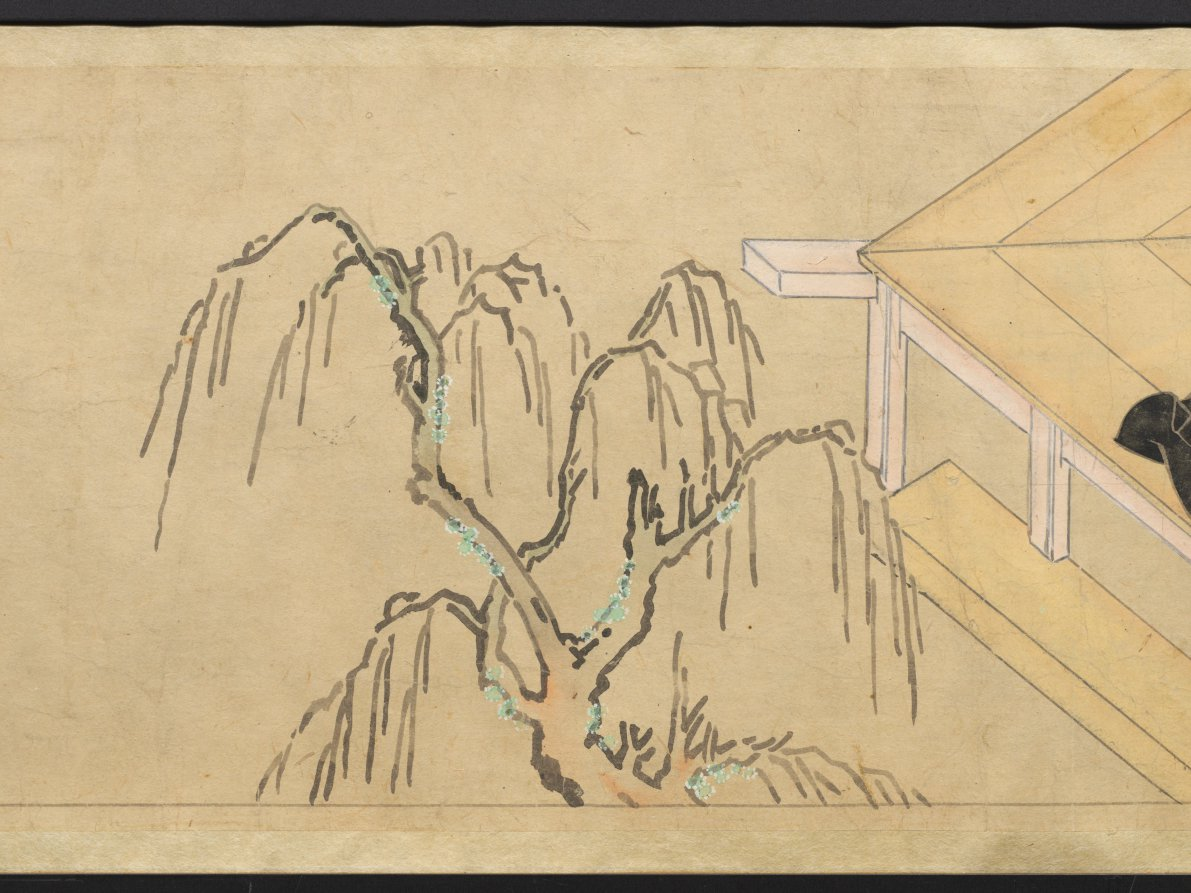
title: The Saltmaker's Story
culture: Japan, Edo period (1615–1868)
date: early 1600s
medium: One of a pair of handscrolls; ink, color, and gold on paper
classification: Painting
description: Once read and copied by girls at New Year’s celebrations and included in dowries, The Saltmaker’s Story is a rags-to-riches tale in which daughters are gifts from the gods. Despite his simple outlook, the main character progresses from humble roots as an associate at Kashima Shrine to the elite status of grandfather of the emperor through the intervention of the Kashima deity. The Saltmaker’s Story is traditionally presented in a set of three scrolls, but the text of this set has been removed by a previous owner, who remounted the illustrations as a pair. The paintings of this one take us from right to left through the first half of the tale.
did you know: This handscroll originally had texts before its paintings, but the texts were removed.